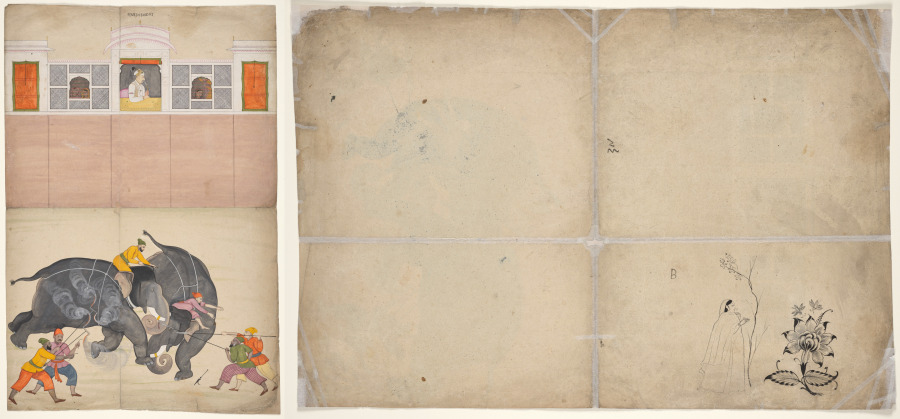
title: Two Elephants Fighting in a Courtyard Before Muhammad Shah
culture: Northern India, Himachal Pradesh, Guler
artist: attributed to Nainsukh (Indian, 1710–1778)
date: c. 1730–40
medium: Gum tempera, ink, and gold on paper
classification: Painting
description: The Mughal emperor responsible for a revival of courtly arts and pastimes was Muhammad Shah (reigned 1719–48). This painting was made by an artist from a small kingdom in the western Himalayas who stayed at the Mughal court in Delhi and painted scenes of his experiences. Like his predecessors, Muhammad Shah enjoyed watching elephant fights. He is shown in his window of public audience, marked by a golden carpet, smoking a hookah. Women from his harem can be seen looking on from behind painted screens. Two pairs of men hold fire brands and spears to prevent the elephants from running off and to keep them under control. The intensity of the fight—captured at a moment when one mahout, or elephant trainer, has dropped his goad and is about to jump off—is augmented by the dense colors and forms in contrast to the otherwise pale planes, balanced only by the strip of palace windows.